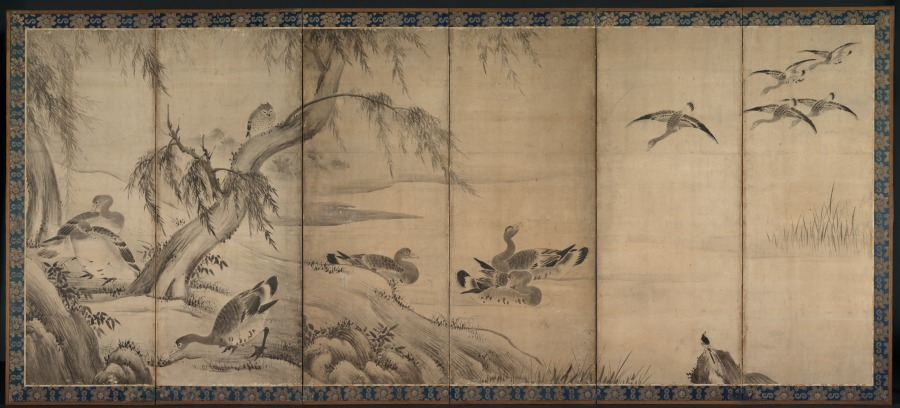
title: Wild Geese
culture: Japan, Edo period (1615–1868)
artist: Kano Sanraku (Japanese, 1559–1635)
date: late 1500s-early 1600s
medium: pair of six-fold screens; ink on paper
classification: Painting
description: Depictions of geese usually appear as ink paintings in Japan during the 1200s. They later show up in the colorful landscapes of illustrated handscrolls. Such early ink renditions of the birds have long been associated with classical Chinese Zen painting and poetry, which was avidly admired and collected in medieval Japan. In the screens on display, the artist portrayed the waterfowl in a pastoral setting without reference to classical or religious themes. Such ordinary subjects were imbued with special meaning in 14th- and 15th-century Japan through associations with continental culture, Zen thought and poetry, and famous Chinese monk-painters whose painting techniques had become revered as visual emblems of Zen principles. The screens here reflect the continuation of that painting tradition in the late 1500s or early 1600s by the head of the most important studio in Kyoto. Sanraku also executed a number of colorful folding screen compositions, but here pays homage to the style of early Zen painting.